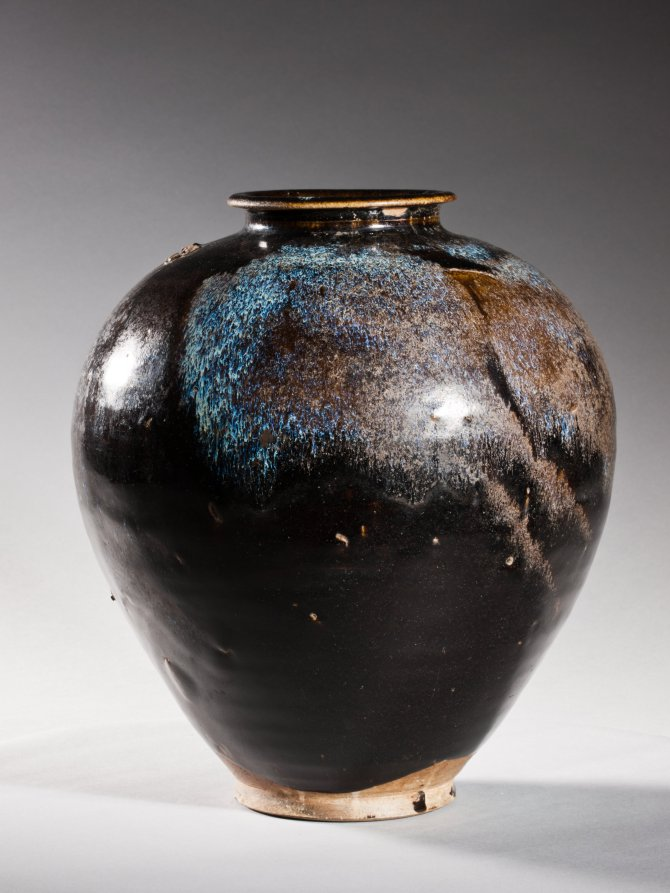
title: Jar: Black Ware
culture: China, Henan province, Huangdao kilns, Tang dynasty (618-907)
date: 700s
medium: glazed stoneware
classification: Ceramic